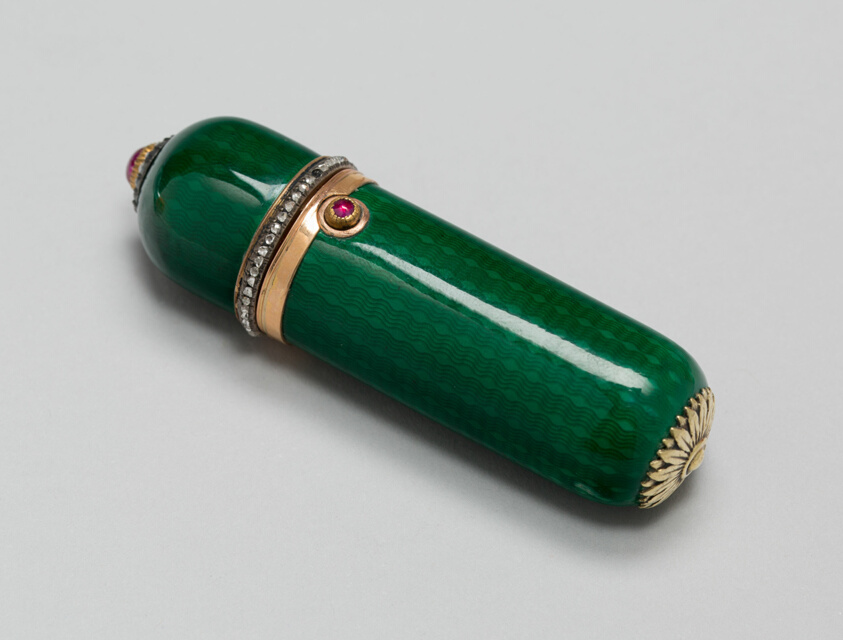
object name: Metalwork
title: Miniature Perfume Bottle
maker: Fabergé Workshop; Saint Petersburg or Moscow, Russia, 1842-1917; Master Craftsman: Michael Perchin; Russian, 1860-1903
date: Late 19th century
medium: Gold, silver, enamel, diamonds, and rubies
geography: Saint Petersburg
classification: enamel; european decorative arts; metalwork